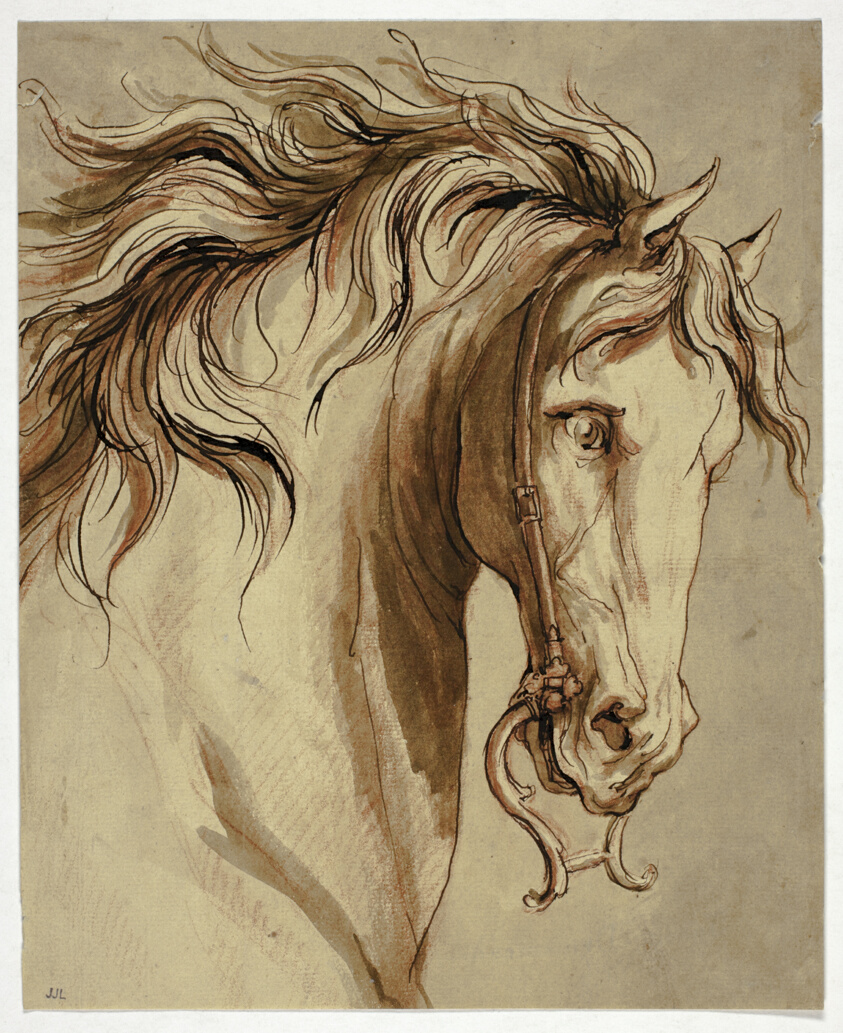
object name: Drawing and Watercolor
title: Study for Sculpture of William III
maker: John Michael Rysbrack (Flemish, 1693-1770)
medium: Pen and brown ink, with brush and brown wash, over red chalk, on cream laid paper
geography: Flanders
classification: pen and ink drawings; paper; drawings (visual works); prints and drawing